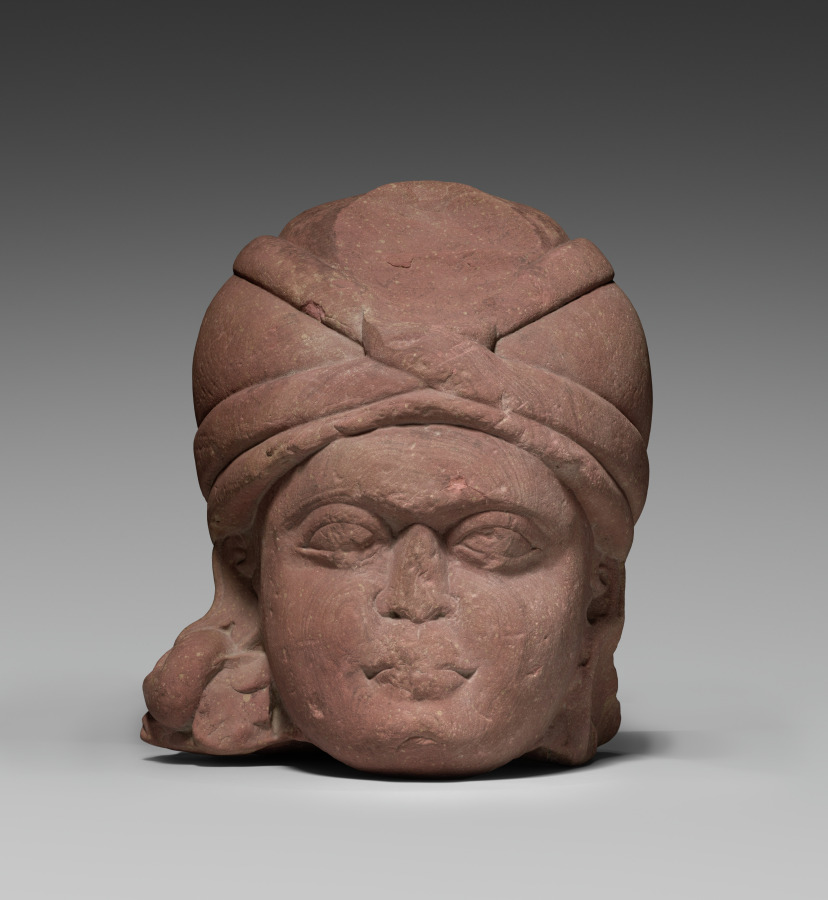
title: Head of a Yaksha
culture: Northern India, Uttar Pradesh, Mathura, Shunga period (185–78 BCE)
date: c. 125 BCE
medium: mottled red sandstone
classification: Sculpture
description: Colossal statues of yakshas, male divinities who personify the productive forces of nature, were especially popular in the northern Indian region around the ancient city of Mathura. They were installed in shrines in parks and gardens, often associated with extraordinary trees. The red sandstone is from a nearby quarry, called Sikri.